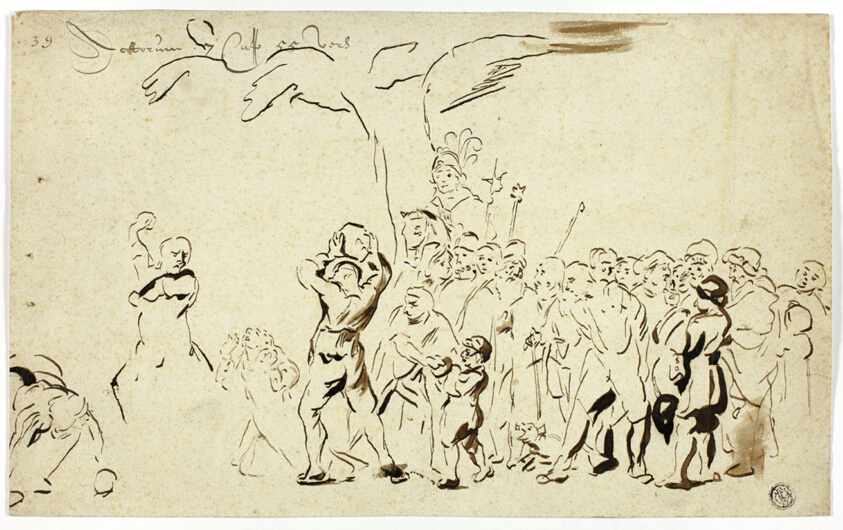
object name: Drawing and Watercolor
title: Stoning of Saint Stephen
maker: After Jan Victors (Dutch, 1620-1676); or Aert de Gelder (Dutch, 1645-1727); or after Samuel van Hoogstraten (Dutch, 1627-1678)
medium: Pen and brown ink, with brush and brown wash, on ivory laid paper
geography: Holland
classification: pen and ink drawings; drawings (visual works); prints and drawing